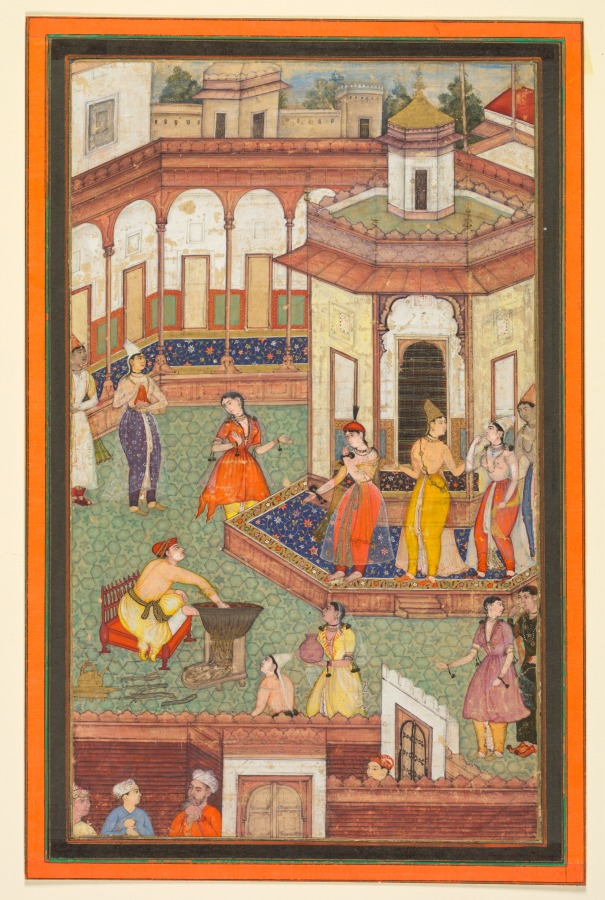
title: A Man Dips His Hand into a Cauldron as Ladies of the Harem Stand in Amazement: A Page from a Manuscript of Religious History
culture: Mughal India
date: c. 1600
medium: Gum tempera and gold on paper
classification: Painting